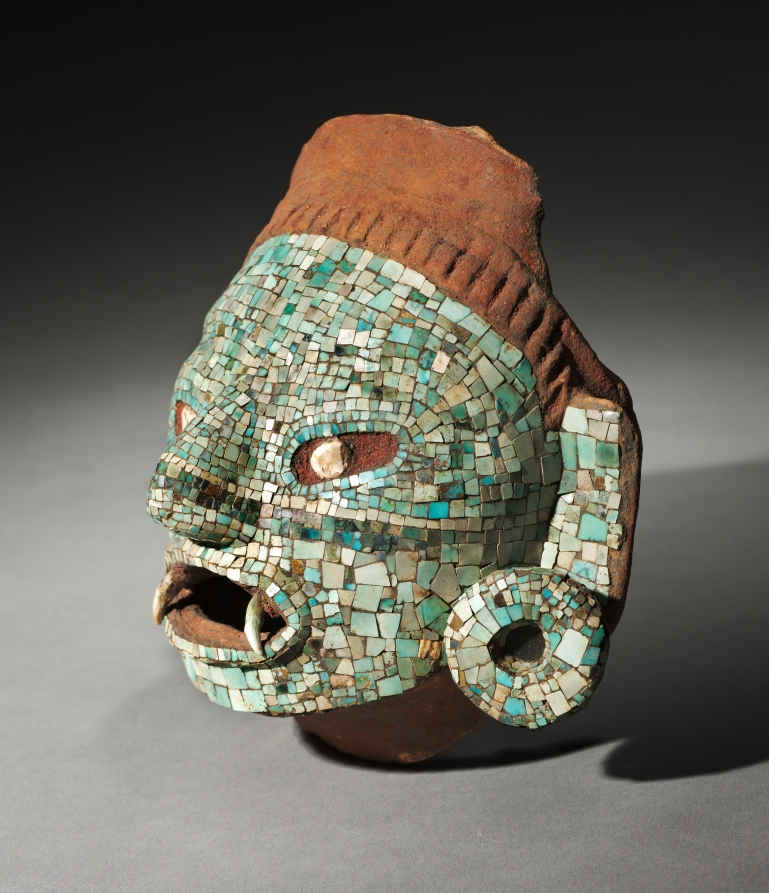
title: Mask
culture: Mesoamerica (or Mexico), 16th century or earlier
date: before 1519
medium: turquoise and terracotta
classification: Sculpture